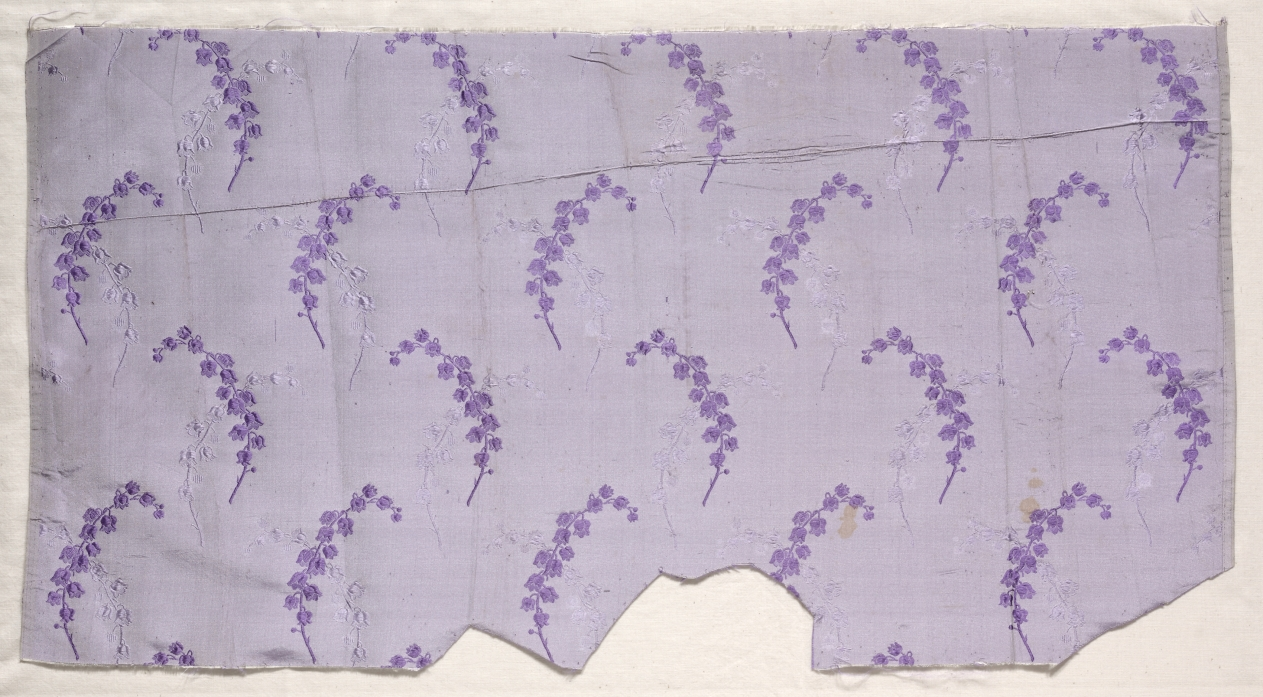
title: Brocaded Taffeta with Lily of the Valley Design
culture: France, late 19th century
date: c. 1870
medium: patterned tabby weave; silk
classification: Textile